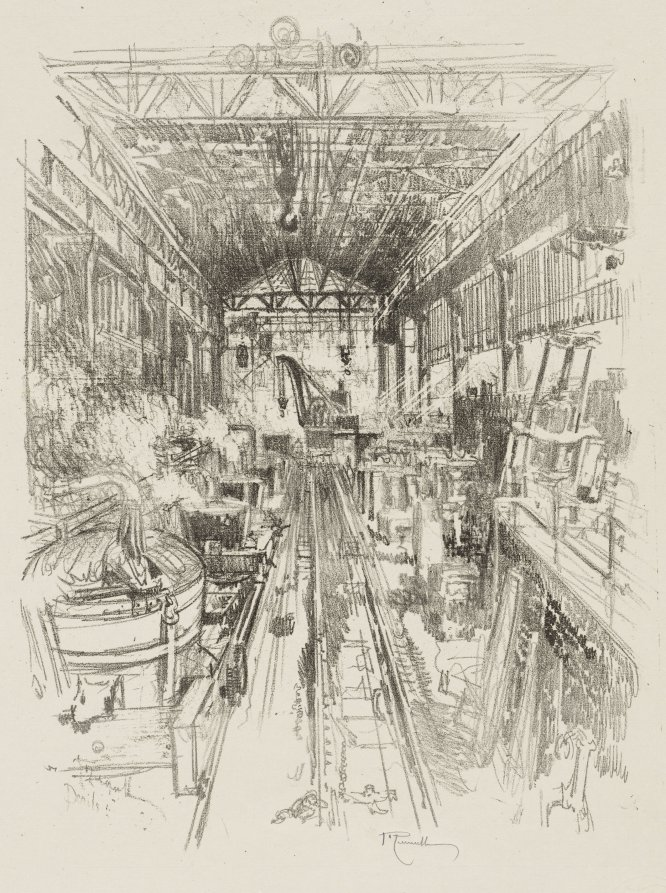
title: English War Work: The Cauldrons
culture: America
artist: Joseph Pennell (American, 1857–1926)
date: 1916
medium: lithograph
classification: Print